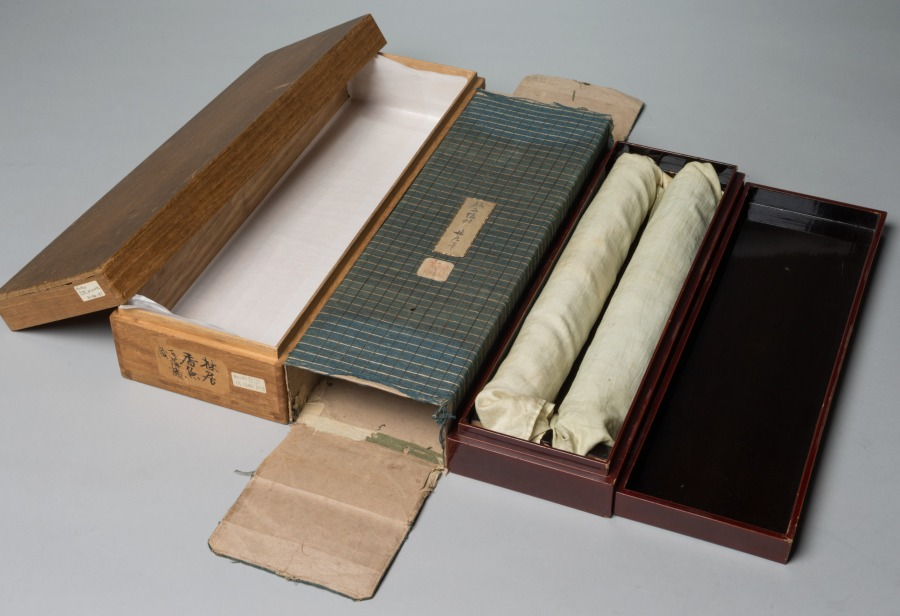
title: Fish and Rock; Fish and Seaweed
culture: Japan, Momoyama period (1573–1615)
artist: Rinkyo (Japanese)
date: 1573–1615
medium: pair of hanging scrolls; ink on paper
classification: Painting